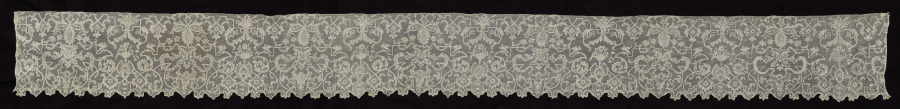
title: Lace Flounce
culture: England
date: 1680s–1790s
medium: Linen: needle lace (drawnwork) and embroidery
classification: Lace